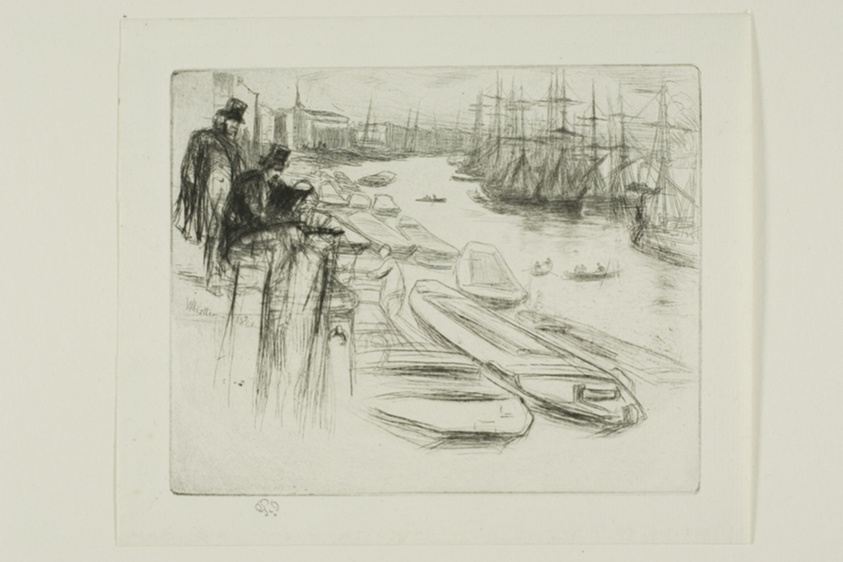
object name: Print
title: The Little Pool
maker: James McNeill Whistler (American, 1834-1903)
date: 1861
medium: Etching and drypoint with foul biting in black ink on ivory laid paper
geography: United States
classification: etching; foul biting; print; prints and drawing; drypoint; paper